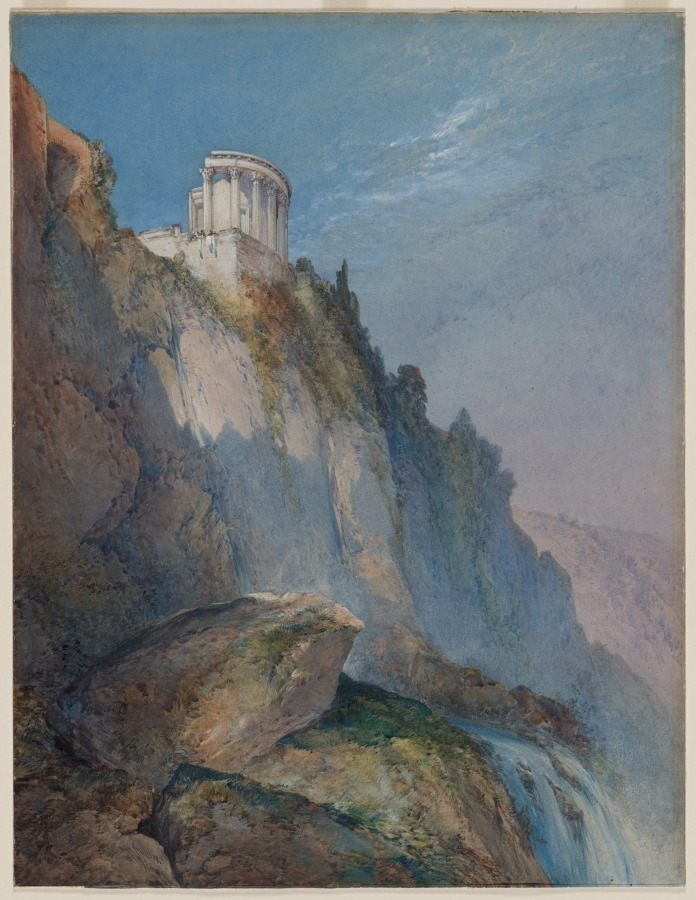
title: The Temple of Vesta and the Falls at Tivoli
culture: England, 19th century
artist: William Callow (British, 1812–1908)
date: 1859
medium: watercolor with gouache and graphite underdrawing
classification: Drawing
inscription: Signed and dated, at lower left, in dark brown wash: William Callow / 1859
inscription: inscribed on backing board (in a modern hand): No. 3 / Temple of Vesta / Tivoli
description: A meticulously finished, grand-scale presentation watercolor, this drawing was exhibited in 1859 at the Society of Painters in Water Colours in London. The view was taken from a low vantage point, foregrounding closely observed, moss-covered rocks amid the frothy cascade. Jewel-like, the Temple of Vesta surmounts the imposing cliff, gleaming white against a crisp, blue sky. The majesty of the view is underscored by the presence of nearly imperceptible figures in the far distance hanging linens to dry along the temple wall.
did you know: William Callow likely based the view seen in this drawing on sketches made during his first trip to Italy in 1840.